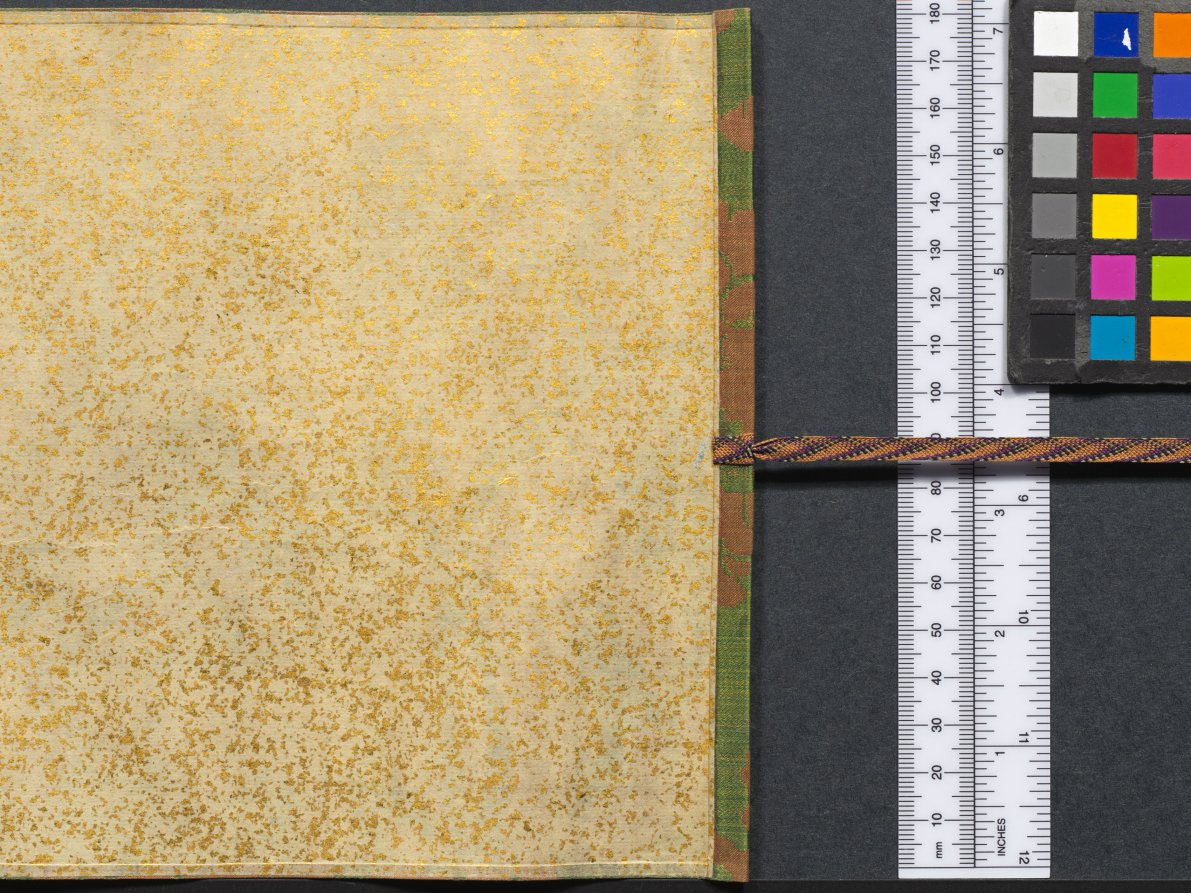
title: The Saltmaker's Story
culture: Japan, Edo period (1615–1868)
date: early 1600s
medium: One of a pair of handscrolls; ink, color, and gold on paper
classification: Painting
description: Once read and copied by girls at New Year’s celebrations and included in dowries, The Saltmaker’s Story is a rags-to-riches tale in which daughters are gifts from the gods. Despite his simple outlook, the main character progresses from humble roots as an associate at Kashima Shrine to the elite status of grandfather of the emperor through the intervention of the Kashima deity. The Saltmaker’s Story is traditionally presented in a set of three scrolls, but the text of this set has been removed by a previous owner, who remounted the illustrations as a pair. The paintings of this one take us from right to left through the second half of the tale.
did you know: This handscroll originally had texts before its paintings, but the texts were removed.